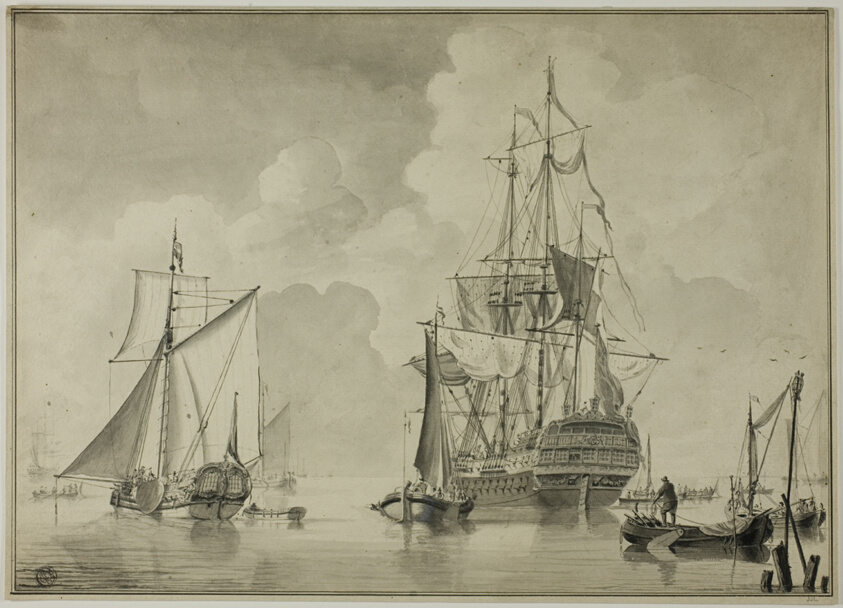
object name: Drawing and Watercolor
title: Warships and Other Boats in Harbor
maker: Unknown Artist; Dutch, 18th century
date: 1780/90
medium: Brush and gray wash, with touches of white gouache, over graphite, on ivory laid paper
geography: Netherlands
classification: ink or chalk wash; drawings (visual works); prints and drawing